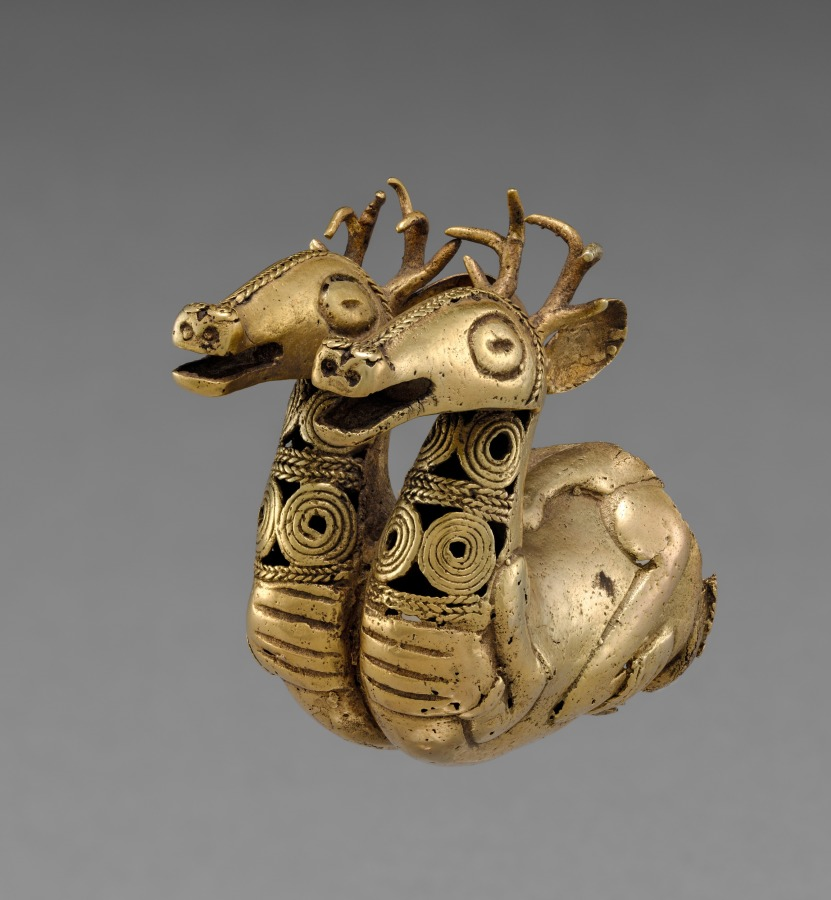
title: Finial with Two Deer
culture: Isthmian Region (Colombia), Sinú (Zenú), 5th century-11th century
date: 400–1000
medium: gold, cast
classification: Metalwork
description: Unique to Colombia's Sinú region are gold finials with sculptural images at right angles to thimble-like caps; the caps fit over the end of a staff, an emblem of rank that may have been held horizontally. This impressive finial features two deer (or a single creature with two deer heads) that hold human-like hands over their chests. Sinú animal imagery is understudied but may relate to beliefs about the cosmos. For instance, contemporary natives attribute importance to birds because they have the capacity to move among different environments (air, land, water); they may have been regarded as mediators among levels of the cosmos.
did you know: This exquisite finial was made using the lost-wax casting process.